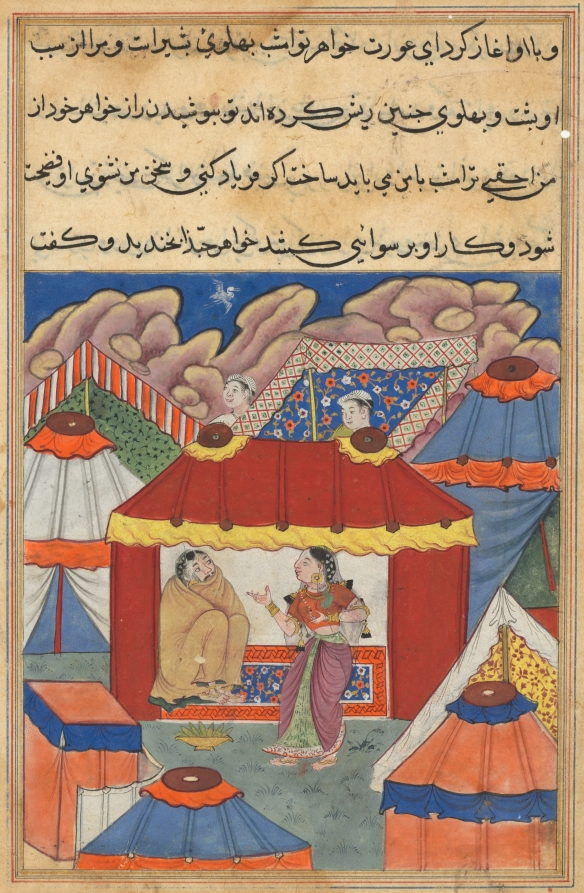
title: Habbaza’s sister, who is sent to console her, discovers the disguised Arab in her place, from a Tuti-nama (Tales of a Parrot): Twenty-fourth Night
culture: Mughal India, court of Akbar (reigned 1556–1605)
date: c. 1560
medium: gum tempera, ink, and gold on paper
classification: Painting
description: The man on the left, disguised as Habbaza, has just been badly beaten by Habbaza’s husband. He is the Arab man who has temporarily taken the woman’s place while she visits with her lover. Upon entering the tent to heal her sister’s wounds, Habbaza’s sister quickly discovers the ruse and begins an affair of her own.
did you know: The tents in the arid landscape evoke the Bedouin community of the Arabian Peninsula.